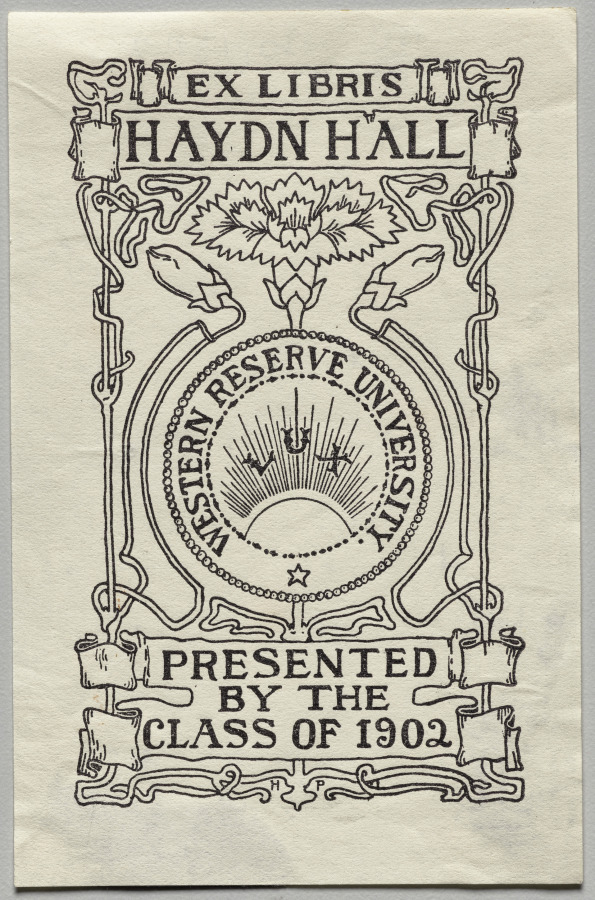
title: Bookplate: Hayden Hall, Western Reserve University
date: 1902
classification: Print